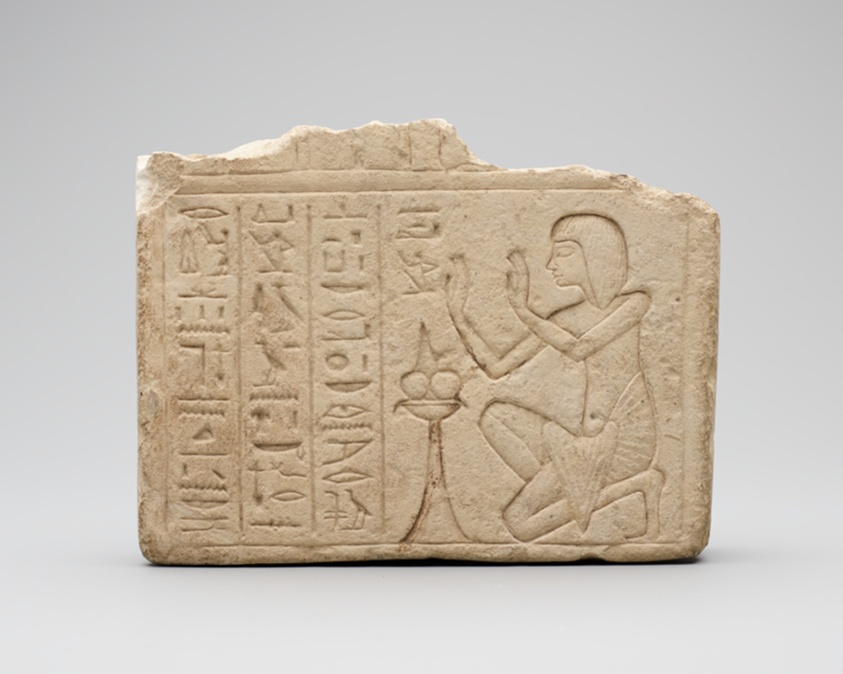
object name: Architectural fragment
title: Stela of Mersumaat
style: eighteenth dynasty, new kingdom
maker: Egyptian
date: New Kingdom, late Dynasty 18, about 1340-1295 BCE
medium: Limestone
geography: Egypt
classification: stone; sculpture; ancient art